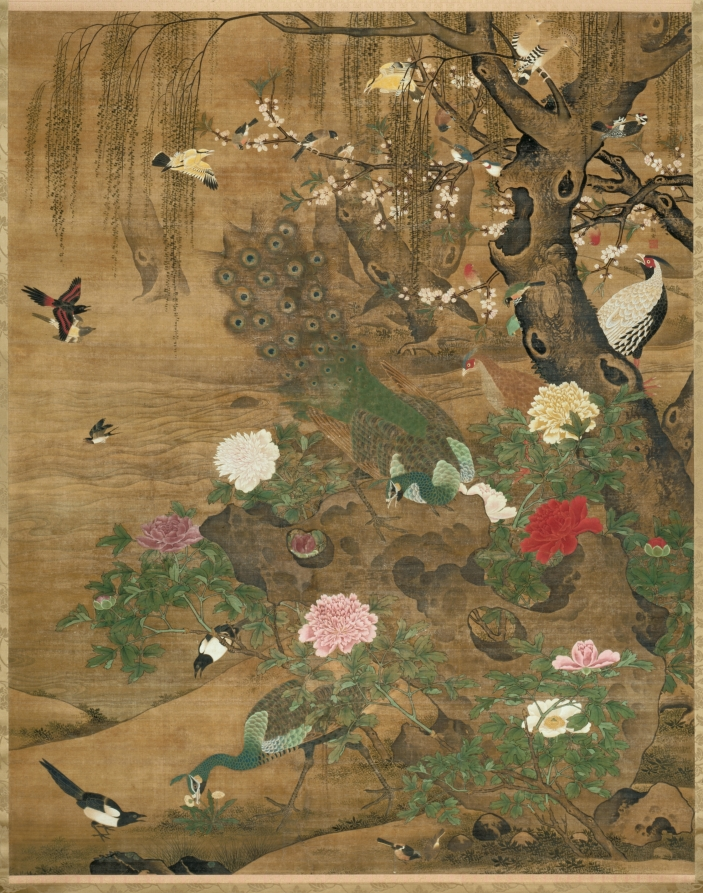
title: Birds Gather under the Spring Willow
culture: China, Ming dynasty (1368–1644)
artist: Yin Hong (Chinese, c. 1430-c. 1500)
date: late 1400s-early 1500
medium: hanging scroll, ink and color on silk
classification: Painting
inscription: 殷宏. [印]金臺世家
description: This scroll depicts a spring scene with all kinds of birds, including one peacock with a hen among peonies. The painting is one of four surviving works by Yin Hong bearing his signature and seals. Some scholars debate whether this work depicts the theme “One Hundred Birds admiring the Phoenix,” a metaphor for human society presenting an idealized hierarchy under imperial rule; other scholars argue that peafowls, as exotic birds not native to China, would not be depicted to represent the emperor. This large painting might have been hung in a palace hall and may have been part of a set depicting the four seasons.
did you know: The peahen is plucking a dandelion.